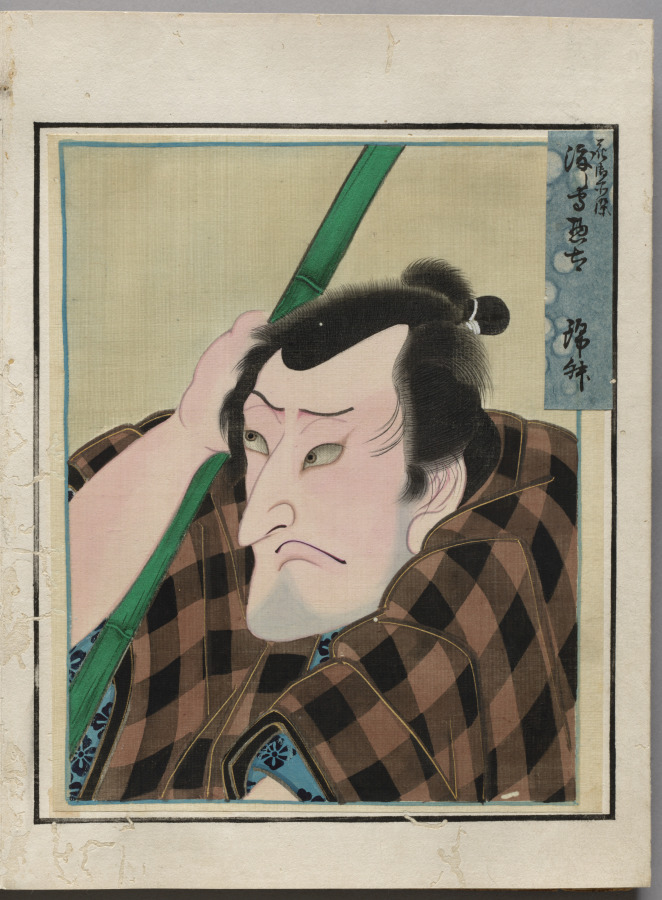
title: Double-Leaf from Album of Actor Portraits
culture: Japan, Edo period (1615–1868)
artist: Shōrakusai (Japanese)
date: c. 1790–1810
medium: double-leaf from an accordion-style album; ink and color on silk (right)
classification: Bound Volume